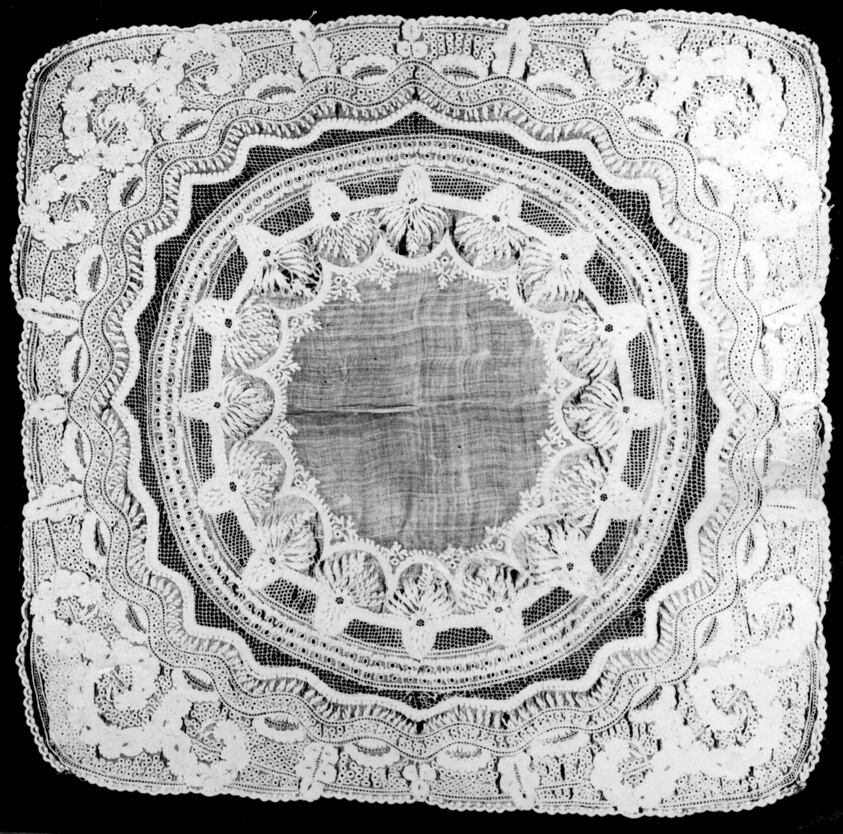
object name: Textile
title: Handkerchief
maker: India, Bombay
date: Mid–19th century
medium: Cotton, plain weave; embroidered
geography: India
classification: textile; needlework (visual works); costume accessory